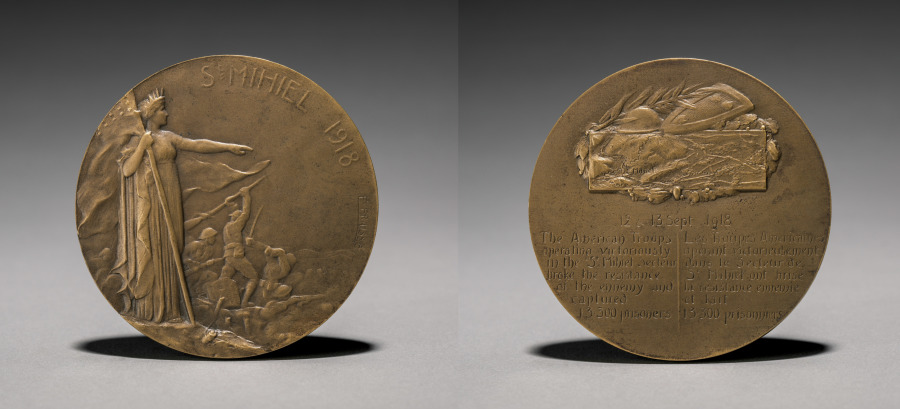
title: Medal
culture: France, 20th century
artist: Edouard Fraisse (French, 1880–1945)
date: 1900s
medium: bronze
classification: Metalwork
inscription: obverse - "St. Mihiel 1918." reverse - "12 - 13 Sept. 1918"; in French and English: "The American Troops operating victoriously in the St. Mihiel secteur broke the resistance of the enemy and captured 13,300 prisoners."